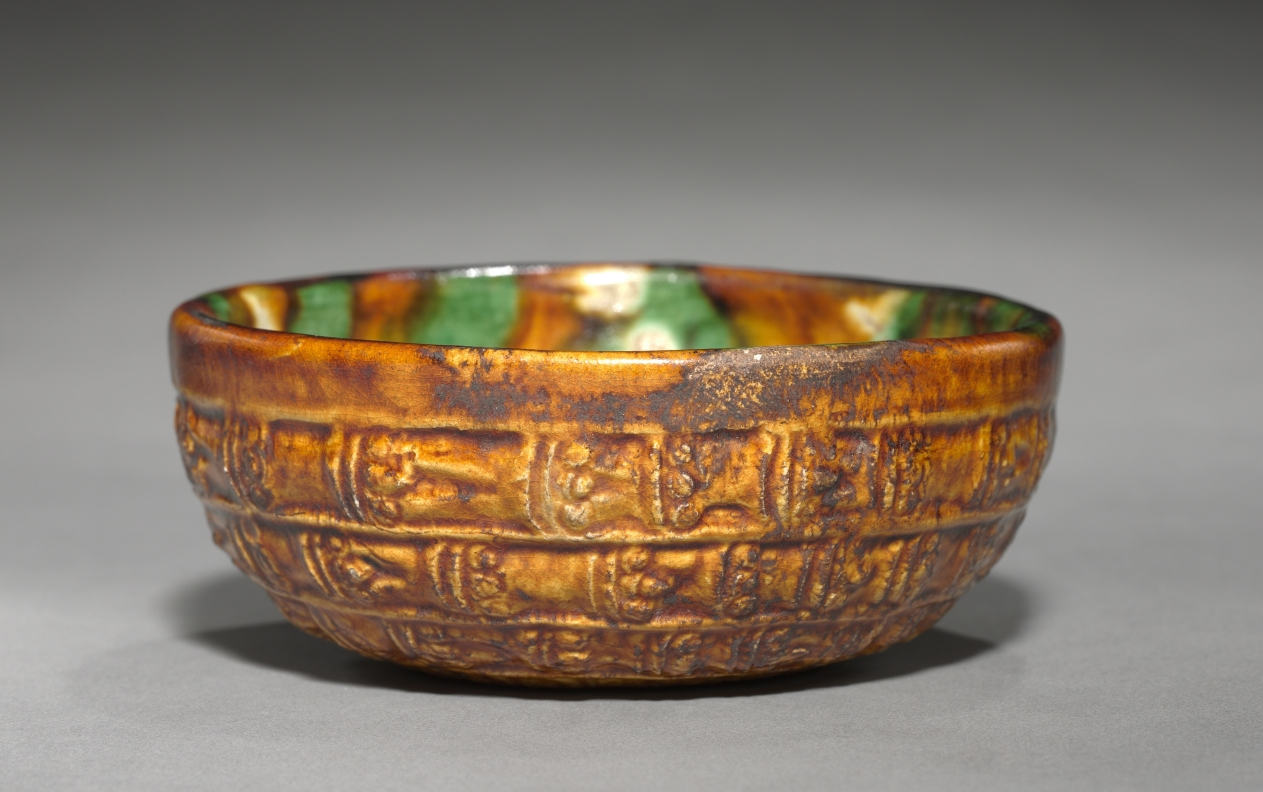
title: Bowl with Bands and Spirals in Relief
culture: China, Tang dynasty (618-907)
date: late 600s–early 800s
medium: glazed earthenware with molded decoration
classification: Ceramic